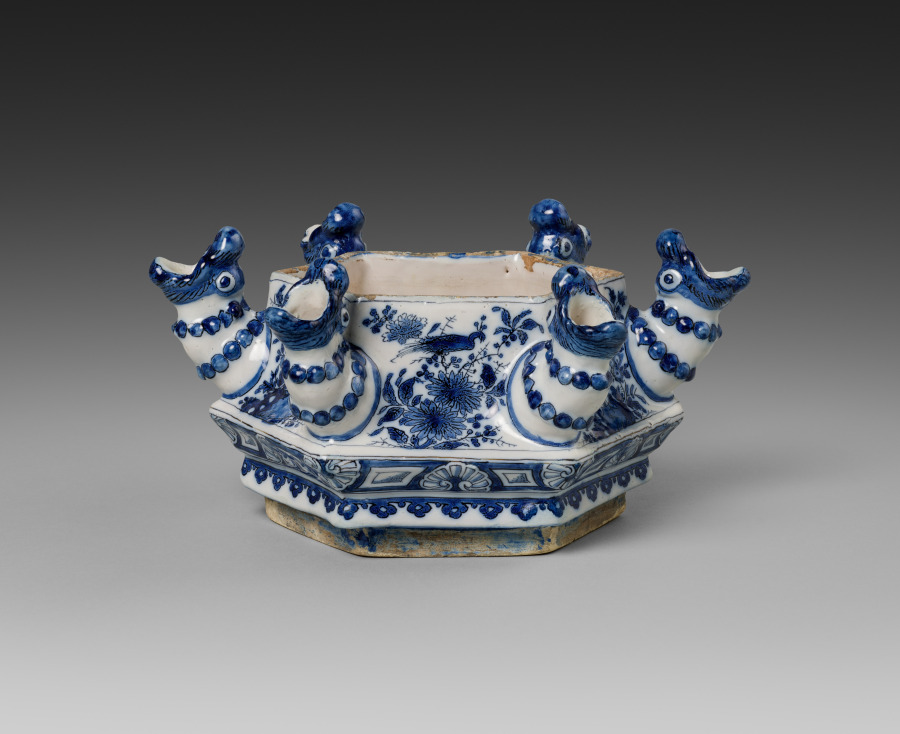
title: Second Tier for a Flower Pyramid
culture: Netherlands, Holland, Delft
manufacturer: Adrianus Kocx (Dutch, active 1686–1701)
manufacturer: De Grieksche A (The Greek A) Factory (Netherlands, 1658–1811)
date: c. 1690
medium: Tin-glazed earthenware, painted in blue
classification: Ceramic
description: Allegorical figures representing Faith, Hope, and Love decorate the base of this pyramid, on which rest six tiers with spouts where flowers can be placed. Flower pyramids are among the most complex and luxurious types of ceramics produced in Delft in the late 1600s. This example was made in the Greek A Factory, owned by Adrianus Kocx. During his tenure, the factory became the most prestigious of Delft potteries and received commissions from Queen Mary II, who ruled over England, Scotland, and Ireland together with her husband, William III. She contributed to the international spread of the fashion for Delft ceramics.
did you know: The iconic blue-and-white ceramics from Delft originated as an attempt to copy Chinese porcelain.